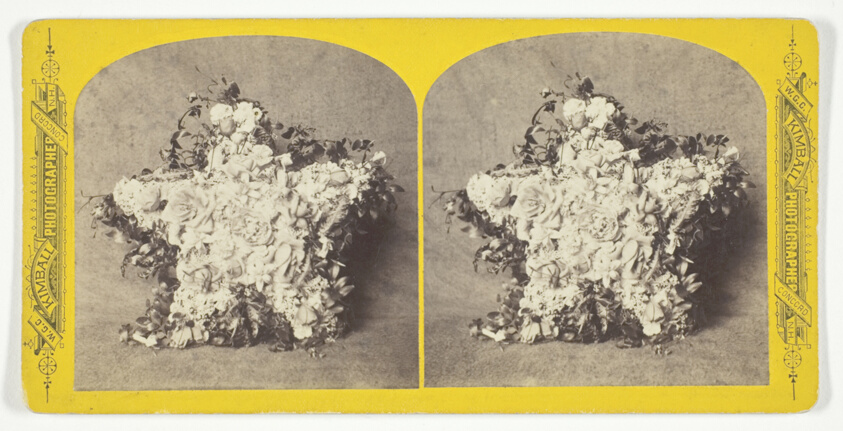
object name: Photograph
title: Untitled (Flower Arrangement)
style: 19th century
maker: W.G.C. Kimball (American, 1868-1916)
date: 1875/99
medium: Albumen print, stereo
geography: New Hampshire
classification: photography; photograph; albumen silver print; stereograph (albumen)